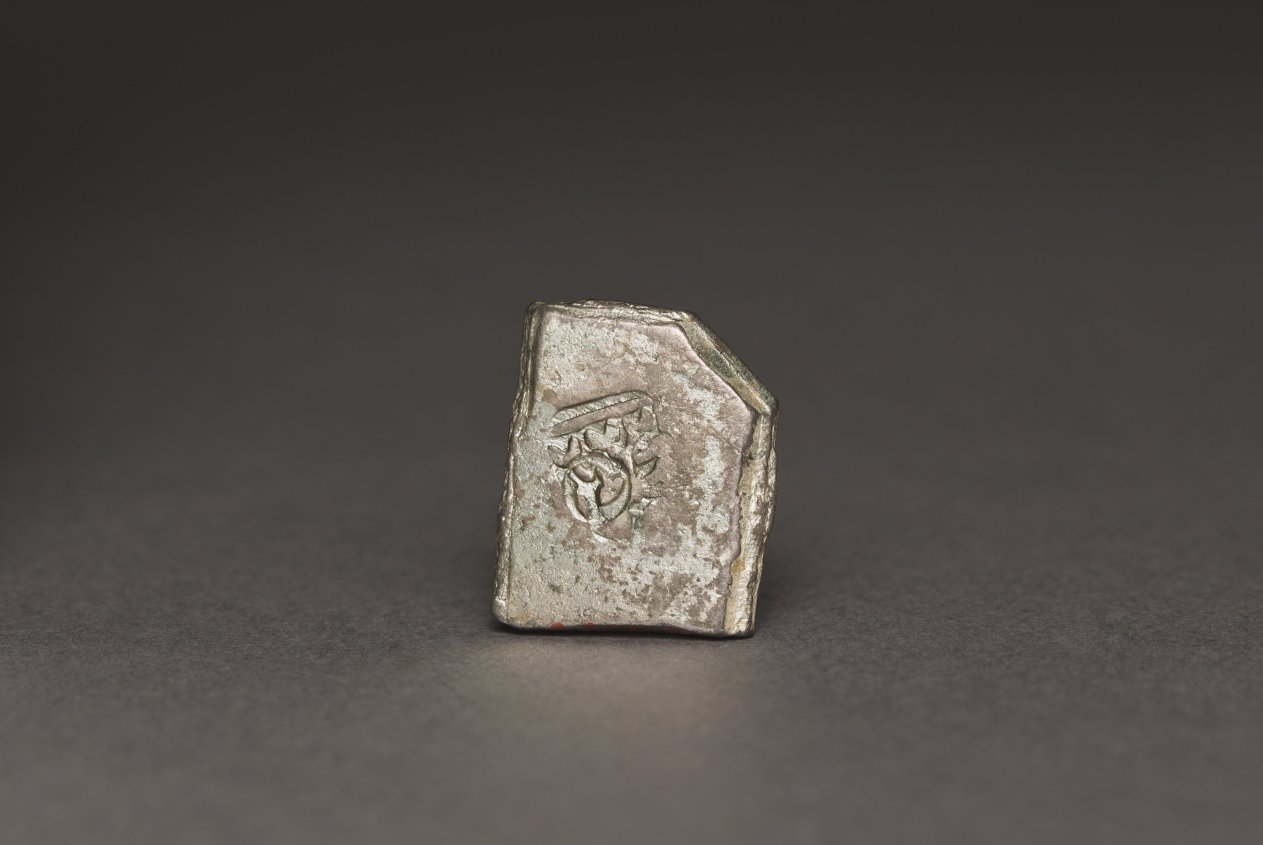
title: Punch-Marked Coin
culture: India, Rajasthan, Maurya period (322–185 BCE)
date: 400–300 BCE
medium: silver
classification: Coins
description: After Alexander of Macedon succeeded in conquering Egypt and Persia in 331 BC, his ambition to rule the known world led him further east across Bactria in Afghanistan, through the Hindu Kush mountain pass, and into India. There he succeeded in defeating all the local kings of the region until his men, on the brink of mutiny, insisted that they return to Greece. Alexander left governors in charge of his territories, and after his death in 323 BC, his governors became independent kings, establishing Hellenistic cities and a Greek cultural base in the region, which lasted for almost 200 years. Native Indian coinage was marked with symbols associated with the place where they were issued.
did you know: Early Indian coins were cut in irregular shapes and punched with a wide range of marks. The deep punches would prove that the coin was pure silver all the way through.